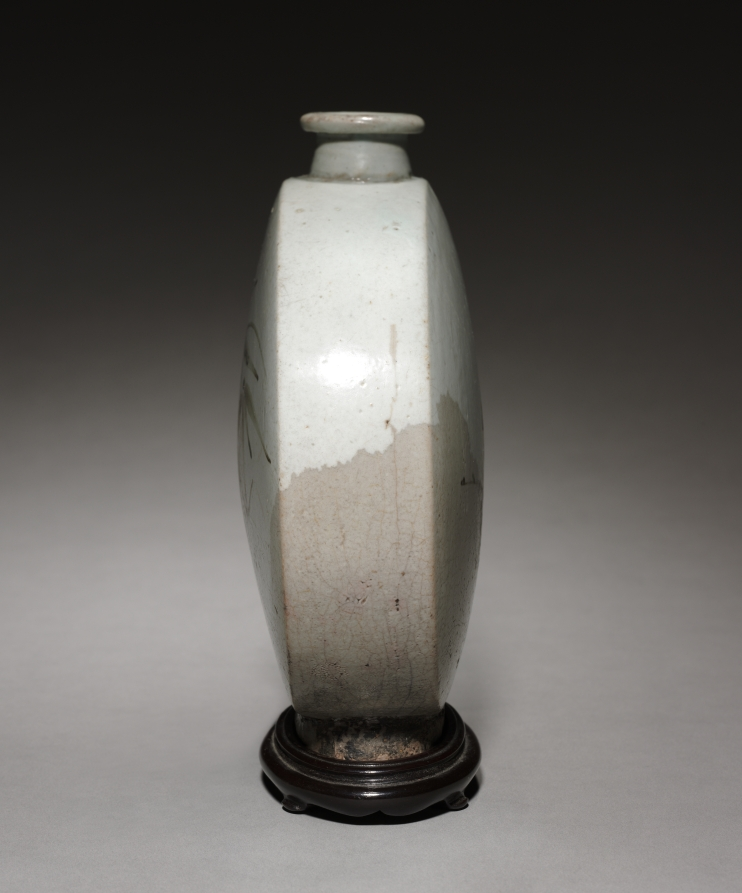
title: Wine Flask with Plum and Bamboo Design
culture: Korea, Joseon dynasty (1392–1910)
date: 1600s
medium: glazed porcelain with underglazed iron design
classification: Ceramic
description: This Korean wine flask embodies Lin Bu’s poetic line "Plums’ subtle scent pervades the moonlit dusk": its circular shape alludes to the full moon, and the gray color unintentionally spread on the flask’s lower part suggests the permeating scent of plum. The other side of the flask features a bamboo design. The plum and bamboo derive from the motif of the Four Gentlemen, which compares four plants to Confucian scholarjunzi, or "gentlemen."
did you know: The shape of this bottle can be traced all the way back to an ancient Persian pilgrim’s flask.